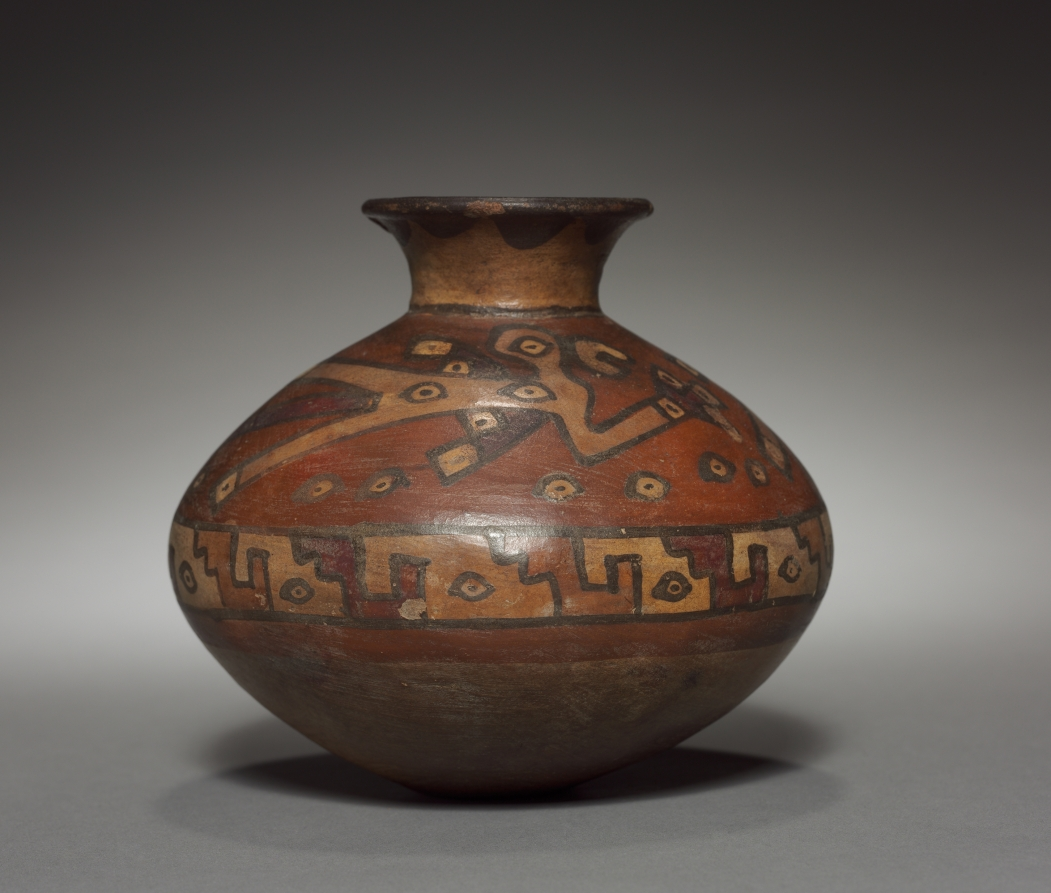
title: Vessel with Bird Designs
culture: Peru, South Coast, Middle Horizon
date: 700–1000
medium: pottery with burnished, colored slips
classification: Sculpture